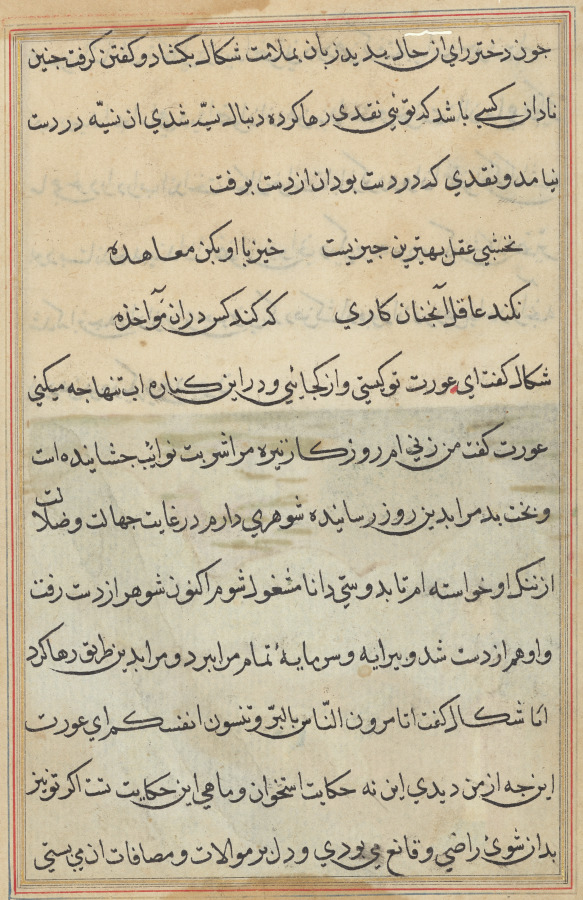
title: Page from Tales of a Parrot (Tuti-nama): text page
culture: Mughal India, court of Akbar (reigned 1556–1605)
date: c. 1560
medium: gum tempera, ink, and gold on paper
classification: Painting